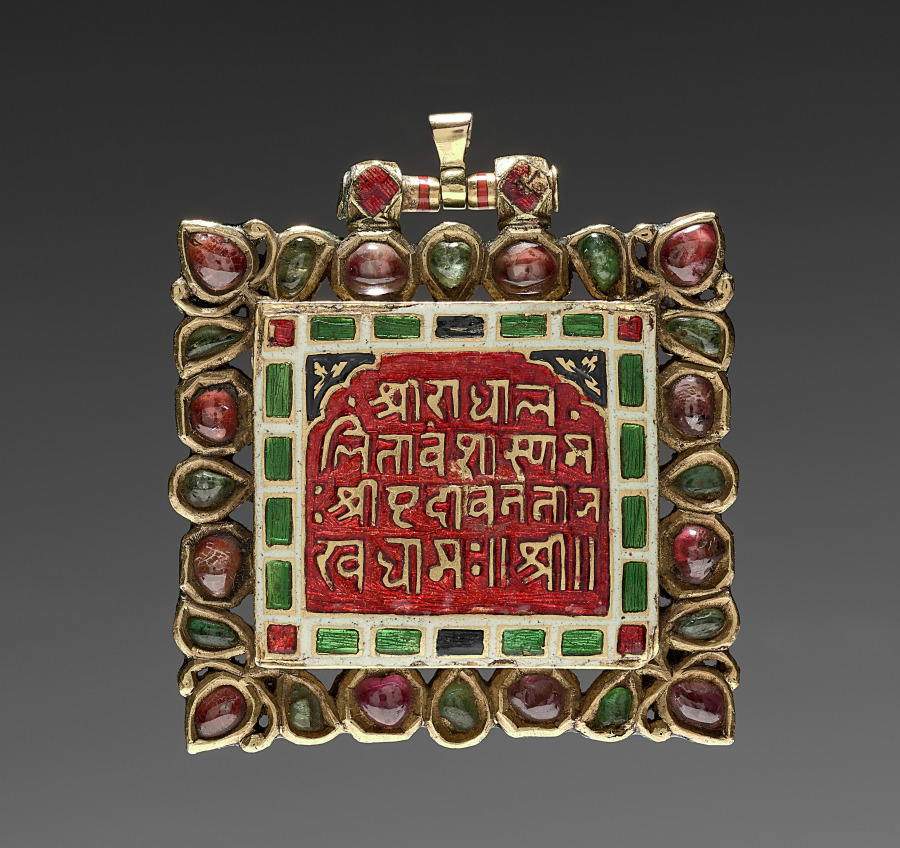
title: Pendant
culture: India, Rajasthan, Jaipur, 18th century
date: 1700s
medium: gold with semi-precious stones and enamel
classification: Jewelry